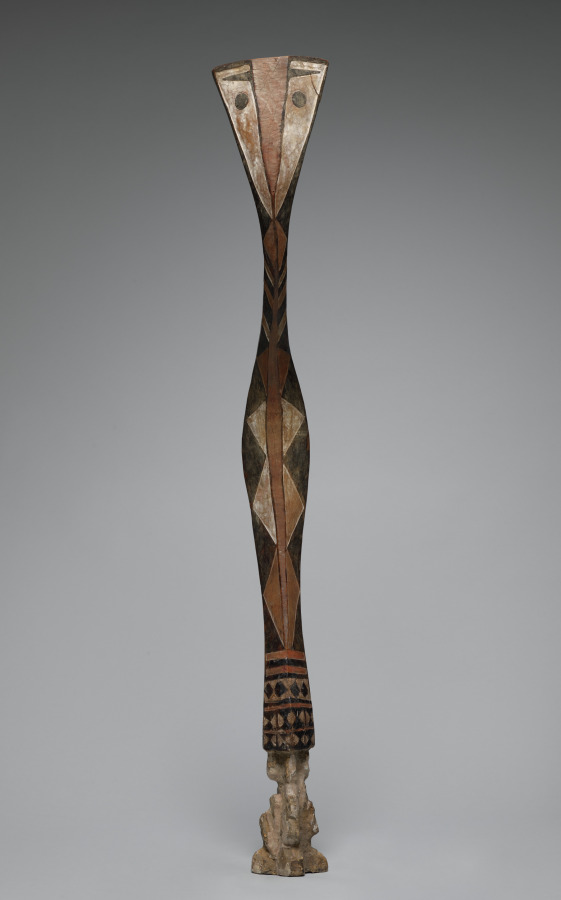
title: Serpent Headdress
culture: Africa, West Africa, Guinea, possibly Baga-style maker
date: late 1800s–early 1900s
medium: Wood (Nauclea pobeguinii) and paint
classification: Mask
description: Traditionally, Baga society was ruled by village councils of elders who derived their power from their direct contact with spirit entities through lifelong initiation rituals and the accumulation of secret knowledge. Two different religious orders controlled initiations, providing the context for much Baga art. One was identified as female, the other as male, though only men belonged to both groups. Initiations in each order followed three stages, culminating in the revelation of the highest spirit being. This type of Baga headdress embodied the serpent spirit Ninkinanka, honored for giving rain, bestowing riches, and bringing forth children. The serpent figure would be placed on top of a conical framework of palm branches carried on a male dancer’s head. It appeared at the end of the first level of the initiation for boys and girls or just before the circumcision at the beginning of the boys’ initiation.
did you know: In the context of boys' initiations, the serpent headdress was sometimes identified as the rainbow, which the Baga and their neighbors associate with beginnings and endings, life and death, and the continuation of lineages.